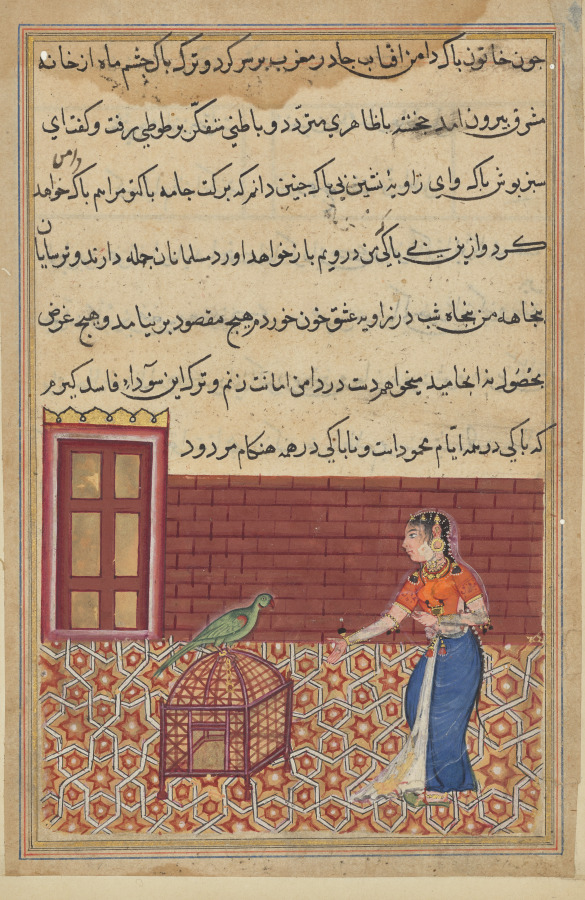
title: The parrot addresses Khujasta at the beginning of the fifty-first night, from a Tuti-nama (Tales of a Parrot): Fifty-first Night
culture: Mughal India, court of Akbar (reigned 1556–1605)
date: c. 1560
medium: gum tempera, ink, and gold on paper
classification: Painting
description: As the sun sets on the fifty-first of fifty-two nights, Khujasta prepares to leave to meet her lover. She is stopped by Tuti, the shrewd, talking parrot, who tells her a story about the cruel King Bahram and the misfortune that befell his vizier’s daughter.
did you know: A thin, gold chain keeps Tuti anchored to his cage.